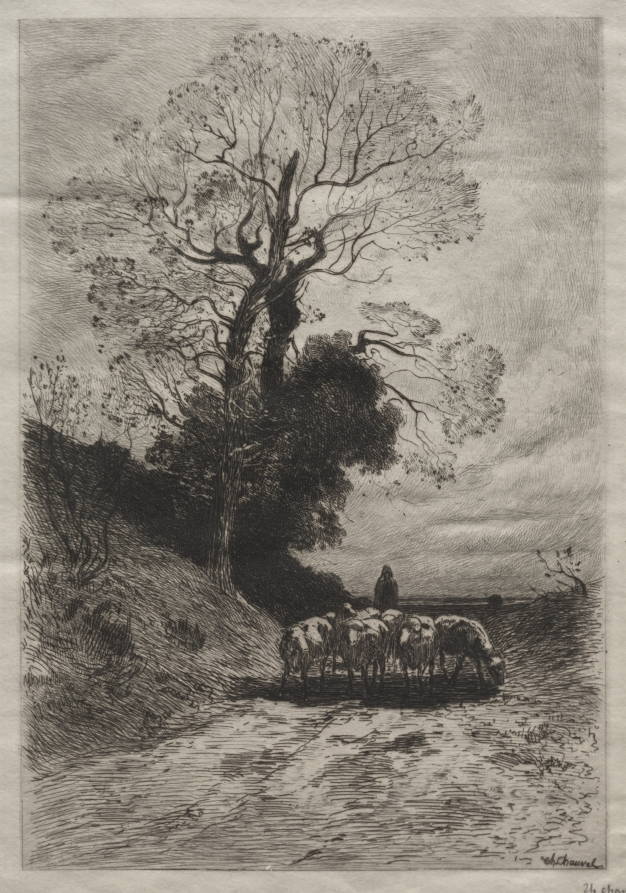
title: Return of the flock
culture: France, 19th century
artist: Theophile Narcisse Chauvel (French, 1831–1909)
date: c. 1870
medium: etching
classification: Print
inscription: signed, in plate: "Th. Chauvel"